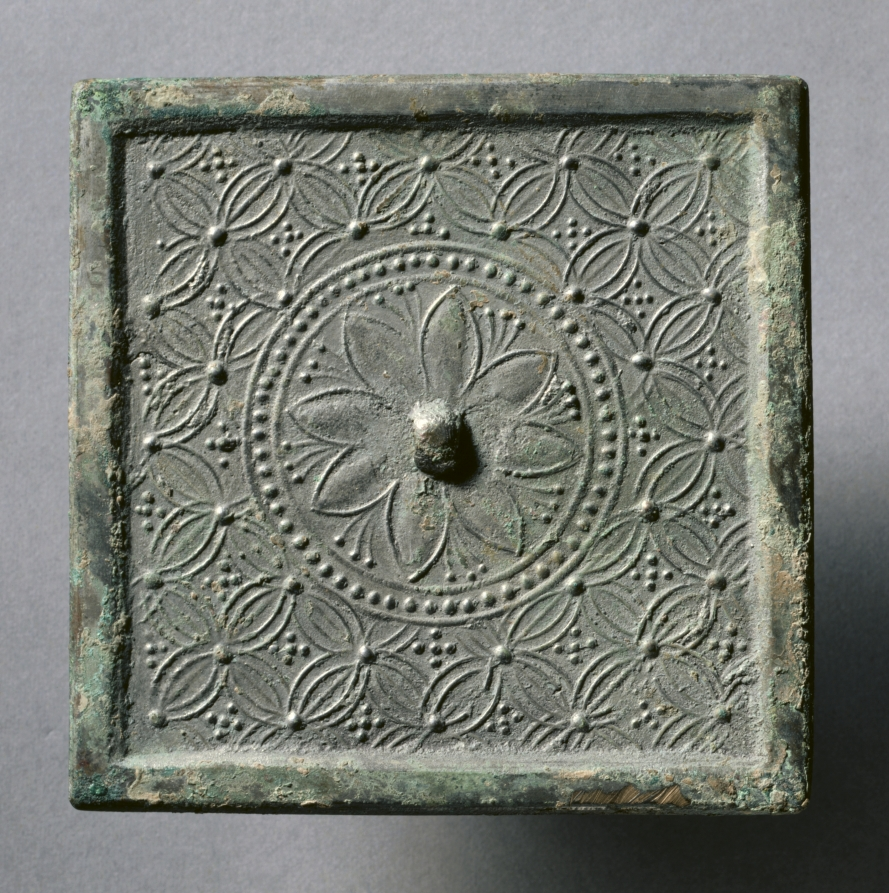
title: Square Mirror with Floral and Coin Motifs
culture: China, Liao dynasty (916-1125) - Song dynasty (960-1279)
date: early 900s-early 1100s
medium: bronze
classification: Metalwork